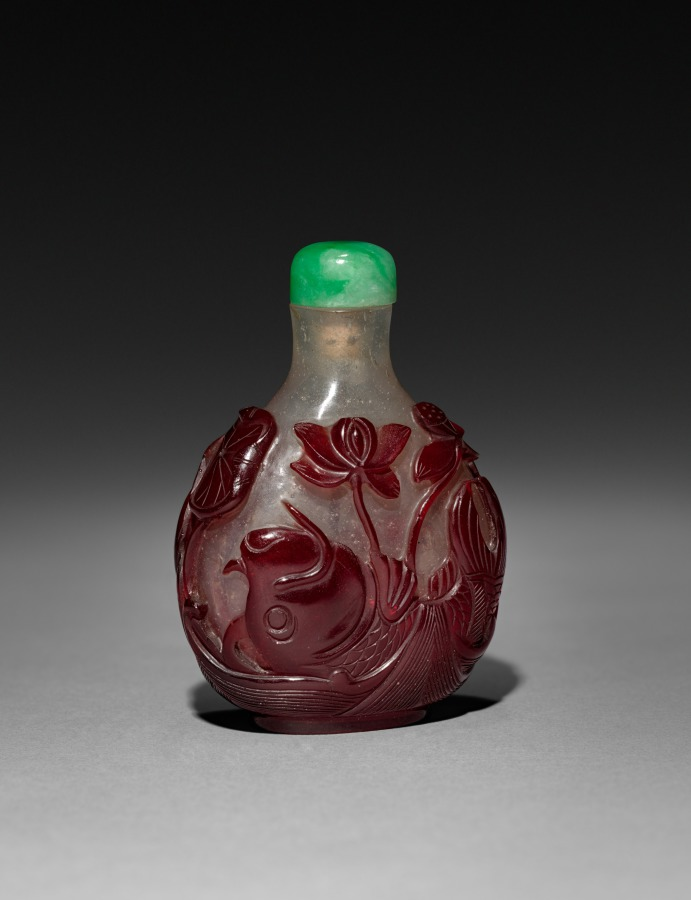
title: Snuff Bottle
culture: China, Qing dynasty (1644-1911)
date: 1644–1911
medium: glass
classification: Glass